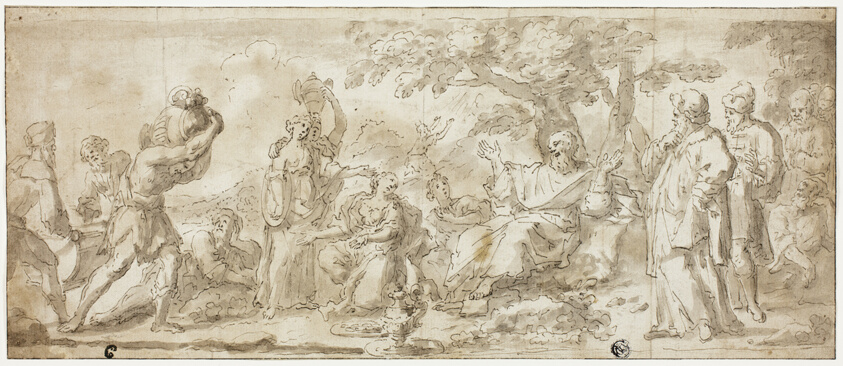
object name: Drawing and Watercolor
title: Israelites in the Wilderness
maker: Unknown Artist (Italian, possibly Neopolitan, 18th century); or possibly Fidele Fischetti (Italian, 1734-1789)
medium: Pen and brown ink, with brush and gray brown wash, over traces of graphite, on ivory laid paper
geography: Italy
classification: drawings (visual works); prints and drawing